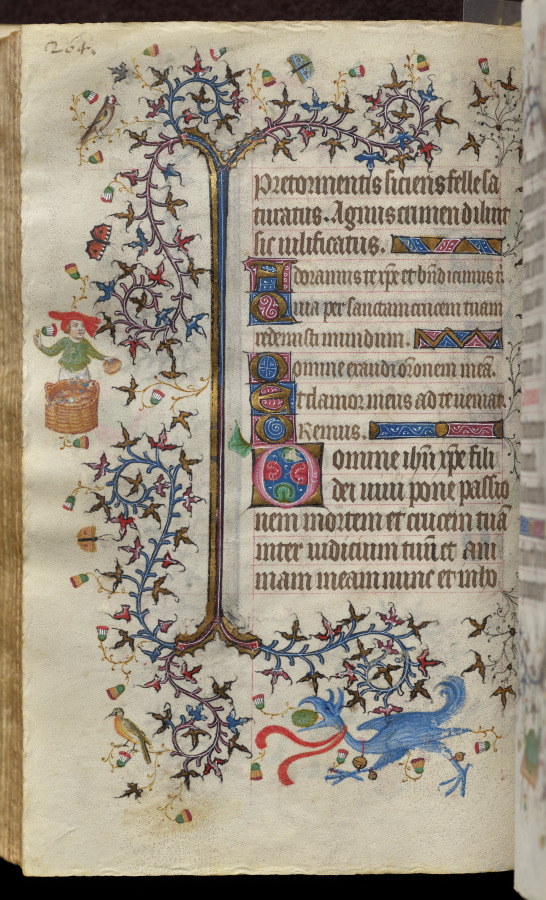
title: Hours of Charles the Noble, King of Navarre (1361-1425): fol. 132v, Text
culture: France, Paris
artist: Master of the Brussels Initials and Associates (French)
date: c. 1405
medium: ink, tempera, and gold on vellum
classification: Bound Volume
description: This precious volume was obviously highly prized by its owner, the French-born King of Navarre, who had his coat of arms painted on no less than twenty folios. Rather than directly commissioning this manuscript from a specific workshop, it seems that Charles the Noble acquired his book of hours -- perhaps ready-made for the luxury market -- while on a trip to Paris in 1404-05. A collaborative effort, six painting styles are evidenced within the pages of this codex, those of two Italians, two Frenchmen, and two Netherlanders. The painter who was responsible for the planning and decoration of the book, and who produced seventeen of the large miniatures, was a Bolognese artist known as the Master of the Brussels Initials. His principal assistant, responsible for most of the borders, was a Florentine who signed his name "Zecho" da Firenze on folio 208 verso.